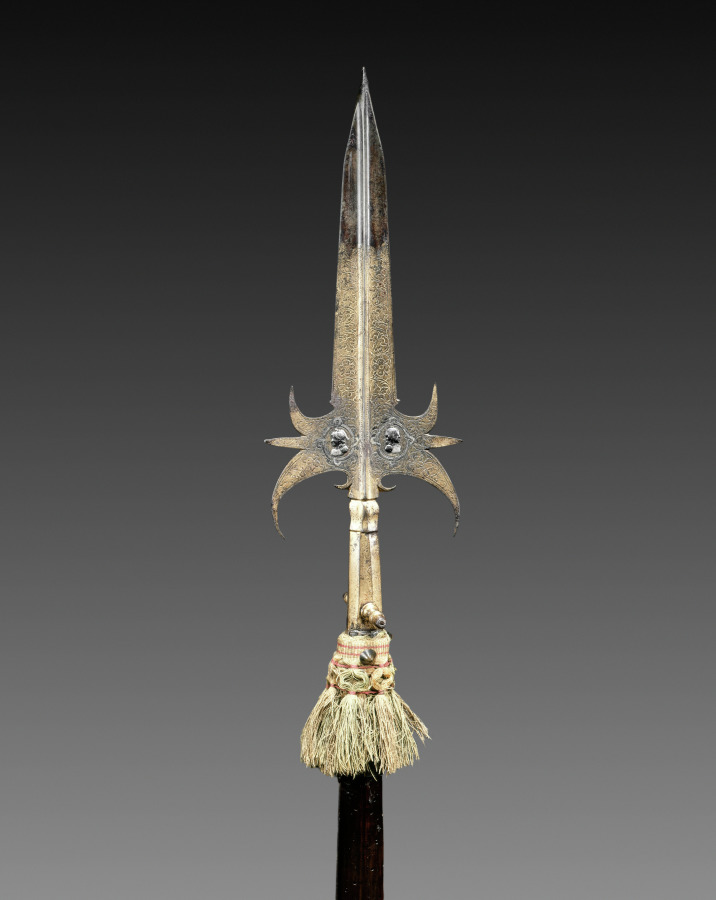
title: Partisan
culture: France, 17th century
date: 1600s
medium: steel, gilt, etched and chiselled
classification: Arms and Armor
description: The partisan, a staff weapon with a symmetrical head, was carried by infantry officers and members of princely bodyguards during the 1600s and 1700s. The large flat surface of the partisan was perfect for displaying coats of arms and with the addition of colorful velvet tassels, was a favored weapon of palace guards who would be splendidly outfitted.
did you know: A partisan is a type of polearm that consisted of a spearhead mounted on a long shaft, usually wooden, with protrusions on the sides which aided in parrying sword thrusts.